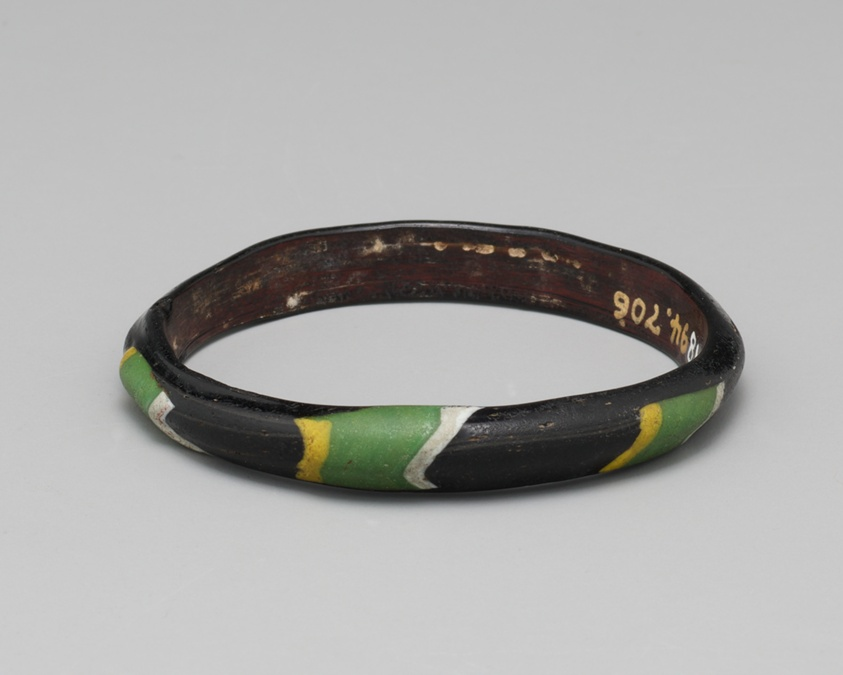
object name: Costume and Accessories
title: Bracelet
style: Islamic (culture or style)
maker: Islamic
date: 14th-15th century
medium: Glass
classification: glass; jewelry; ancient art; costume